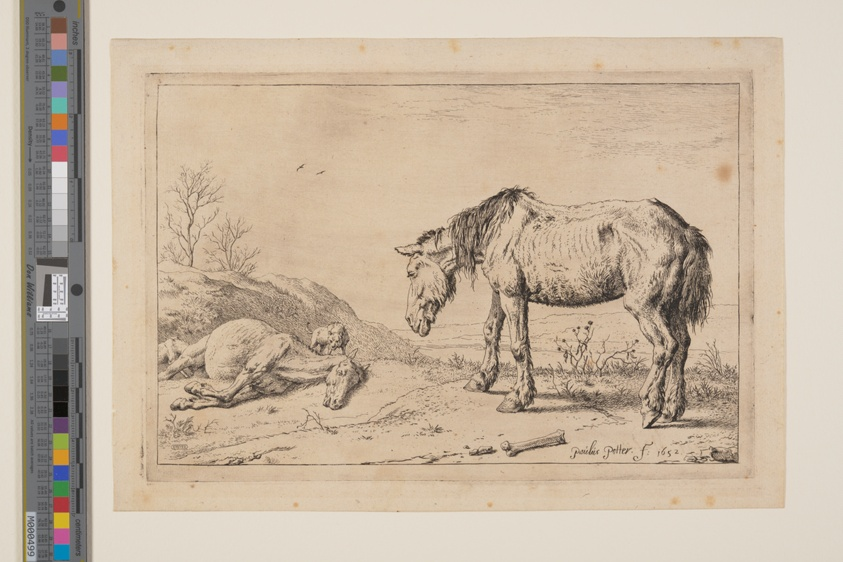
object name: Print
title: The Worn-Out Horse, (La Mazette), from Series of Horses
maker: Paulus Potter (Dutch, 1625–1654)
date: 1652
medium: Etching on ivory laid paper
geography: Netherlands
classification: print; paper; prints and drawing; etching